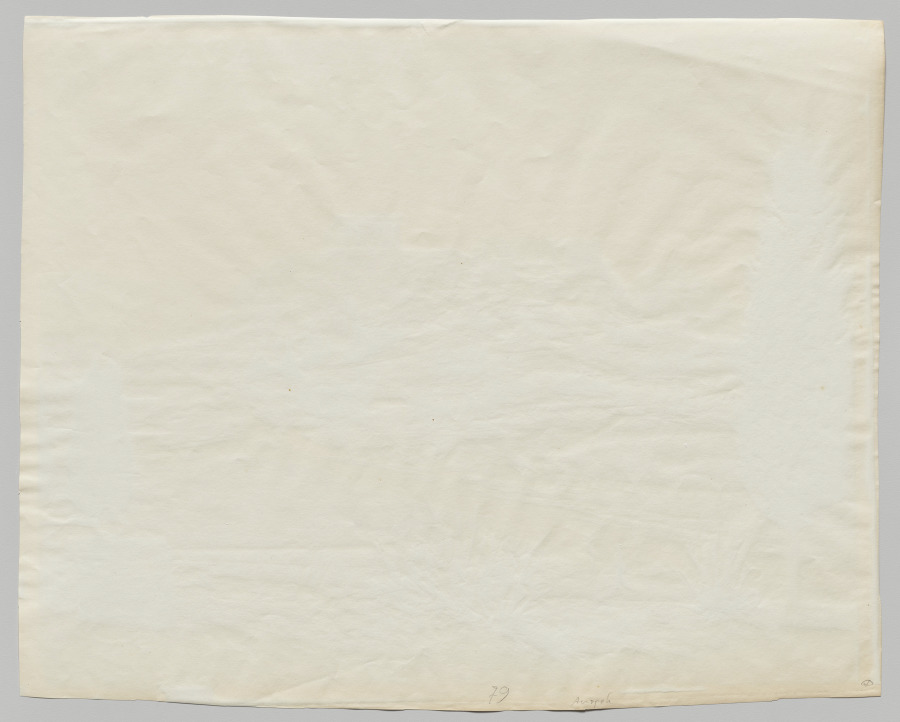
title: View of the Acropolis (walking man in foreground)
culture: France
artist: Adolphe Braun & Co. (French, 1845–1894)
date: c. 1880s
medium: mammoth carbon print, brown-toned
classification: Photograph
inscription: Written in pencil on verso: "79"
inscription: Written in pencil on verso: "Acropole"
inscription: Written in pencil on verso: "D"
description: Adolphe marketed his photos of flowers, artworks, landscapes, and monuments from across Europe throughout that continent and in North America. The Acropolis of Athens, the most famous ancient Greek site, must have sold well; Braun offered multiple views of it. The image on a carbon print is formed from pigmented gelatin, which is far more resistant to fading than the silver or metal salts in silver-based prints.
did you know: Carbon prints are among the stable and long-lasting photographic processes.